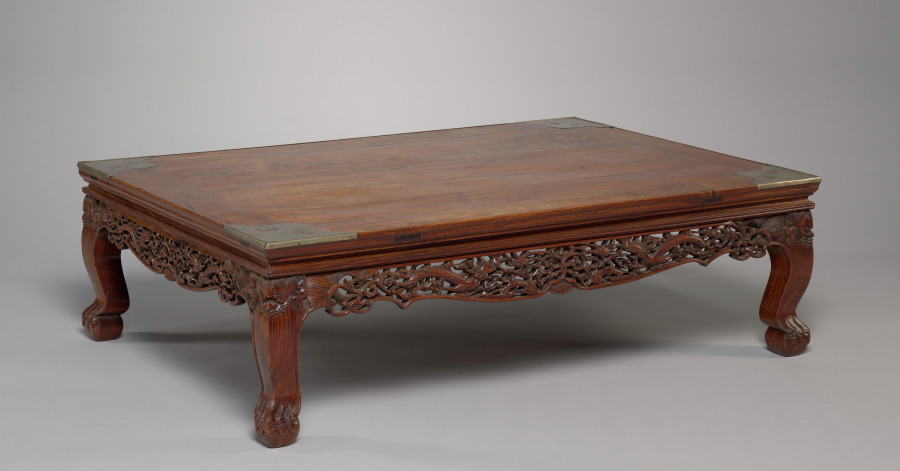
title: Low Table (kang zhuo) with Dragons in Clouds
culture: China, Ming dynasty (1368-1644) or Qing dynasty (1644-1911)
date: 1600s–1700s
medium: Rosewood (huanghuali) and metal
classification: Furniture and woodwork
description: Originally, low tables were placed on a kang, a raised platform made of brick and heated by a fire underneath, which served as a bed and living space on cold winter days in northern China. During the daytime, these platforms could accommodate two sitters with a kang table placed between them. In the warmer south, kang tables were used on daybeds made of wood. By the Ming and Qing dynasties, furniture makers used rare tropical hardwood, such as huanghuali, known as rosewood.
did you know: Note the curved legs, the elaborate openwork carving, and metal-fitted corners in the form of bats.